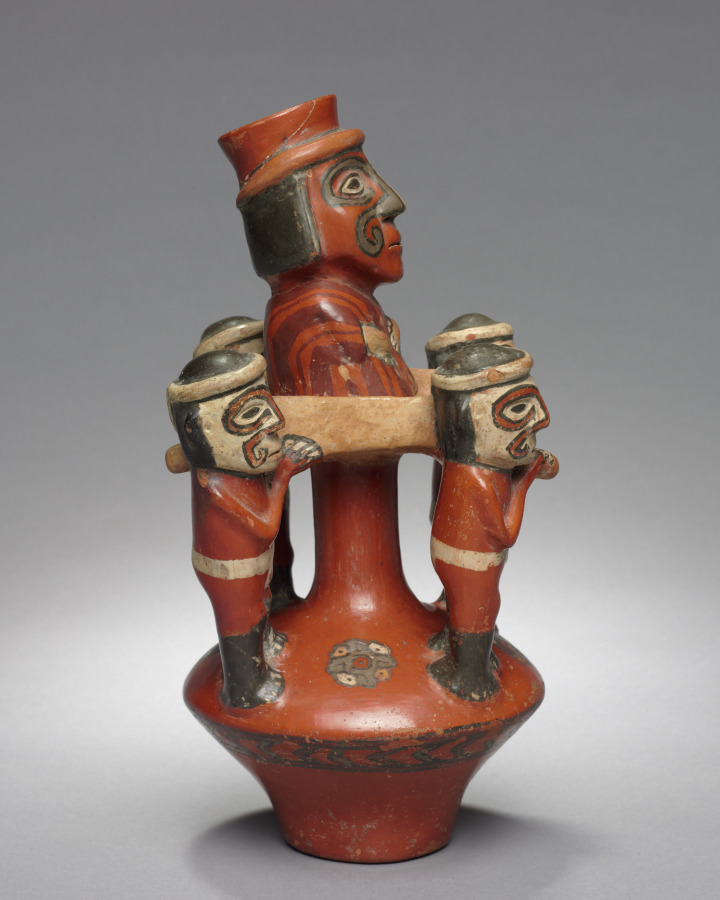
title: Vessel with Litter Group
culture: Central Andes, central highlands, reportedly Wari Wilka, Wari style, 6th-10th century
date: 600–1000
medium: ceramic and slip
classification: Ceramic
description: The sculptural scene atop this vessel's chamber depicts four porters who carry a dignitary in a litter, a high-status mode of transport. Reportedly found at Wari Wilka, a highland water shrine, the vessel empties via a long channel that passes through the body of the dignitary.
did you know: Litters were a mode of transportation reserved for people of high social status.